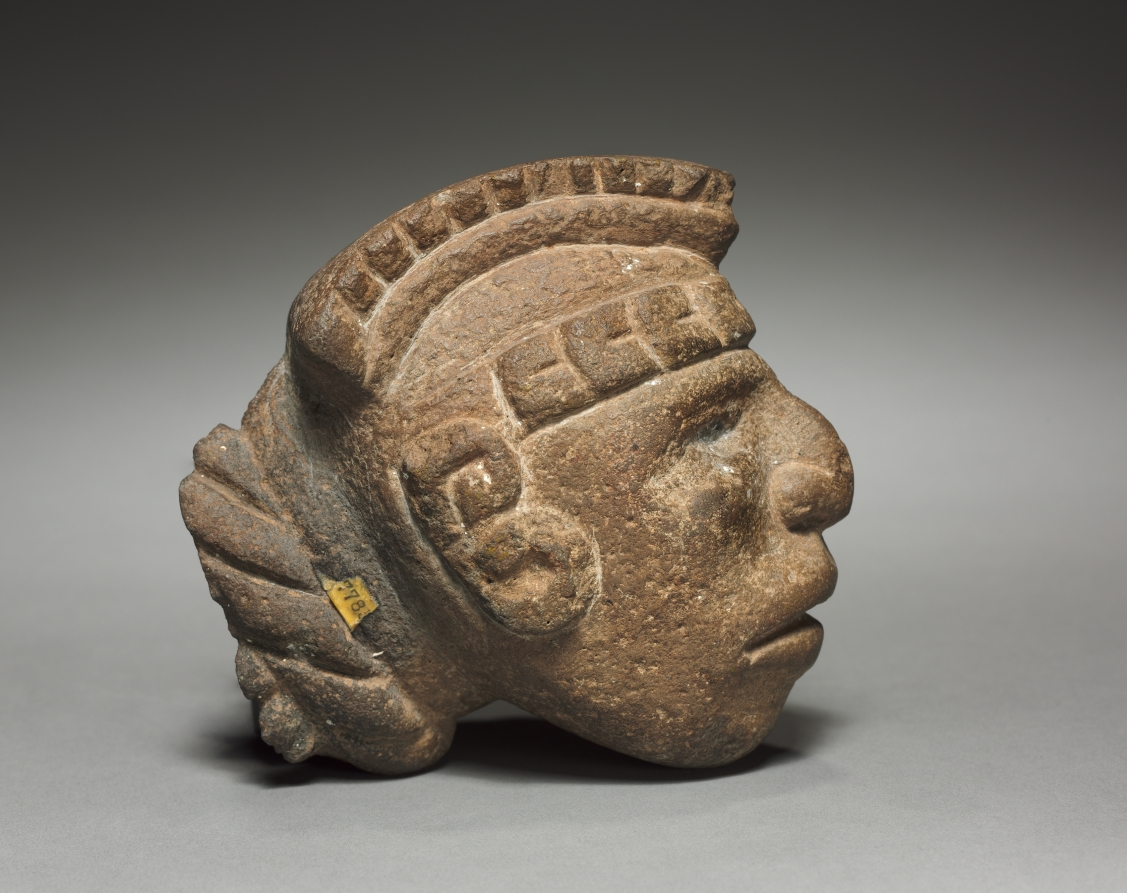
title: Head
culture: Mexico, Classic Veracruz (Totonac or Tajin)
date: 600–1100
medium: stone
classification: Sculpture